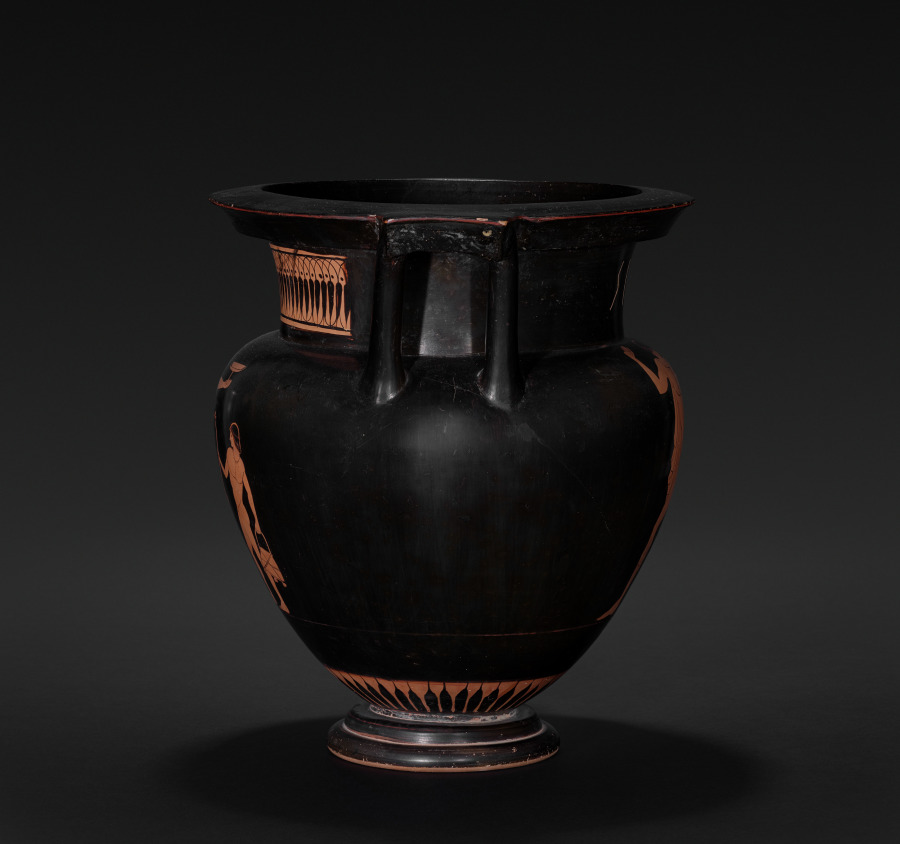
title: Red-Figure Column Krater (Mixing Vessel): Komos (Revel)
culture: Greek, Attic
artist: attributed to Pig Painter (Greek, Attic, active c. 480–460 BCE)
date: 470–460 BCE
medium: ceramic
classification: Ceramic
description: Used for mixing wine and water at a symposium (or drinking party), this column-krater speaks to the perils and pleasures of drinking. On one side, a bearded man holding a staff and a drinking cup leans forward, a red stream of vomit falling from his mouth. Before him is a nude young boy, holding a tortoiseshell lyre and a basket or pail. On the other side, a young man dances, holding a deep cup and wearing just one boot. On the neck above him, scratched in large letters, is the name SIMONOS, probably indicating that the vase once belonged to someone named Simon.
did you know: The bearded man on this vase is vomiting—perhaps a humorous warning against over imbibing.